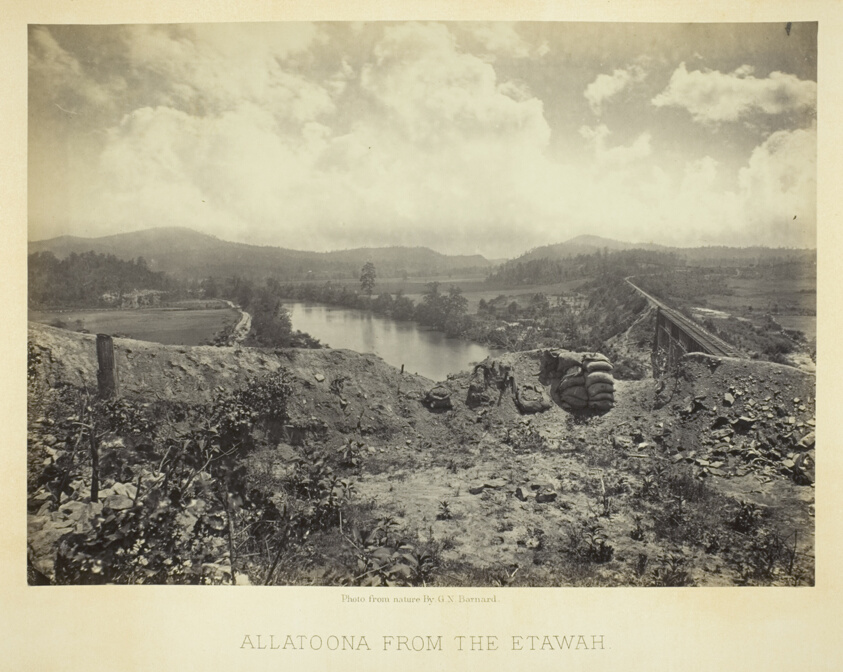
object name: Photograph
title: Allatoona from the Etawah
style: 19th century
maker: George N. Barnard (American, 1819–1902)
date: 1866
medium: Albumen print, plate 24 from the album "Photographic Views of the Sherman Campaign" (1866)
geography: United States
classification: albumen silver print; photographic process; photography; photograph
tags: Collected by Hugh Edwards, Sherman's Campaign 1866